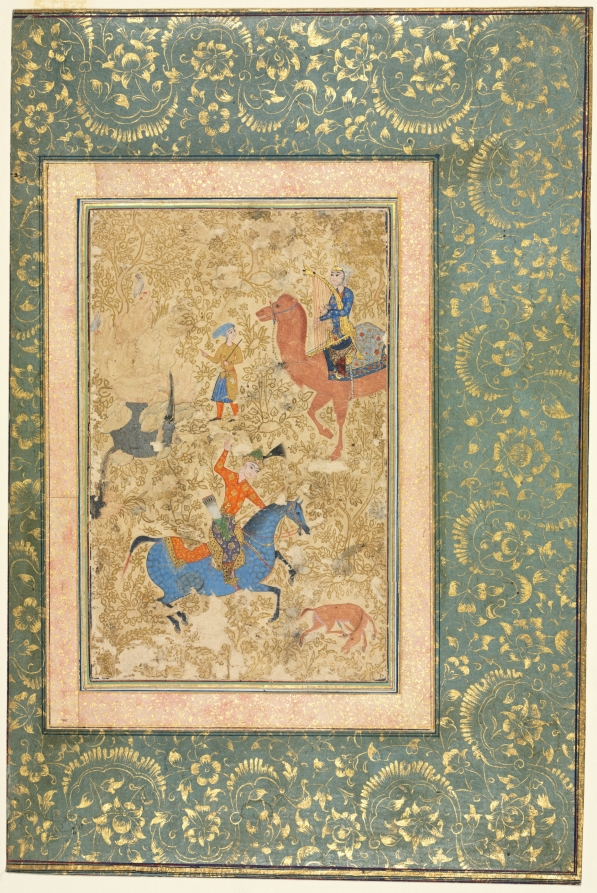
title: Bahram Gur and Azada, from a Shahnama (Book of Kings) of Firdausi (940–1019 or 1025)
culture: Iran, Tabriz or Qazvin, Safavid period (1501-1722)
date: 1500s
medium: opaque watercolor and gold on paper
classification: Manuscript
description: This image from an unfinished painting depicts one of the most popular episodes from the life of the pre-Islamic Persian king Bahram Gur (reigned 420–438 CE). A famed hunter, he was challenged by his concubine, Azada, to strike a donkey through its foot and ear with a single arrow. Azada is in the upper right playing the harp on a camel. Bahram Gur successfully meets her challenge at the bottom of the page; he tossed a rock into the donkey’s ear, then fired when the animal tried to kick it loose.